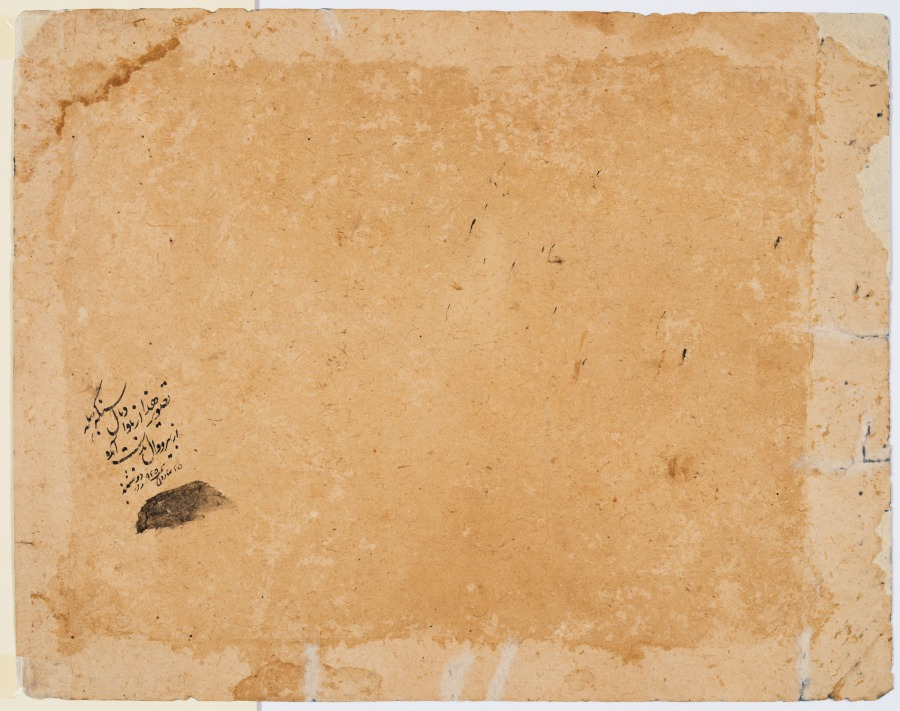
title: Princess smoking a hookah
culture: Northern India, Pahari kingdoms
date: c. 1760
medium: gum tempera, ink, gold, and beetle-wing carapaces on paper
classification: Painting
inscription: Verso: four lines of Persian script on the diagonal: “this picture of B(h)avadnal (a) Sankrhald was obtained from (found in) Biruval, Monday 23….9253.” Bhiruwal is slightly south-east of Lahore city.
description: A lady seated at window smokes a hookah. She wears a translucent lilac blouse and gold trousers and adorns herself with jewelry comprising pearls, gold, and emeralds. Reclining against a large bolster, she is engrossed in smoking her hookah made of gold and porcelain. The painting may have been intended to be presented to the king by the artist.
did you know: The artist has used beetle wings for emeralds in the jewelry.